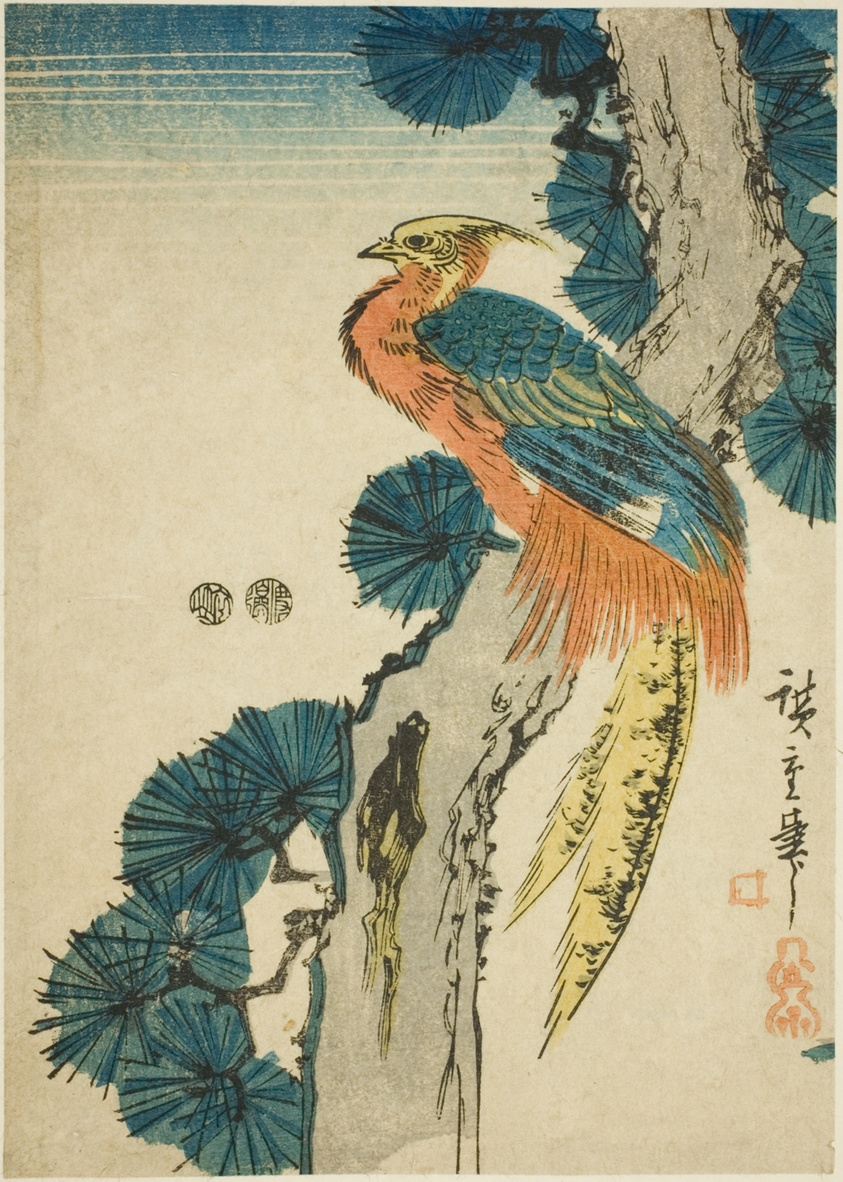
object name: Print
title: Pheasant and pine tree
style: Japanese (culture or style)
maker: Utagawa Hiroshige 歌川 広重; Japanese, 1797-1858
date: c. 1847/52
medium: Color woodblock print; koban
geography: Japan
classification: woodblock print; print; asian art